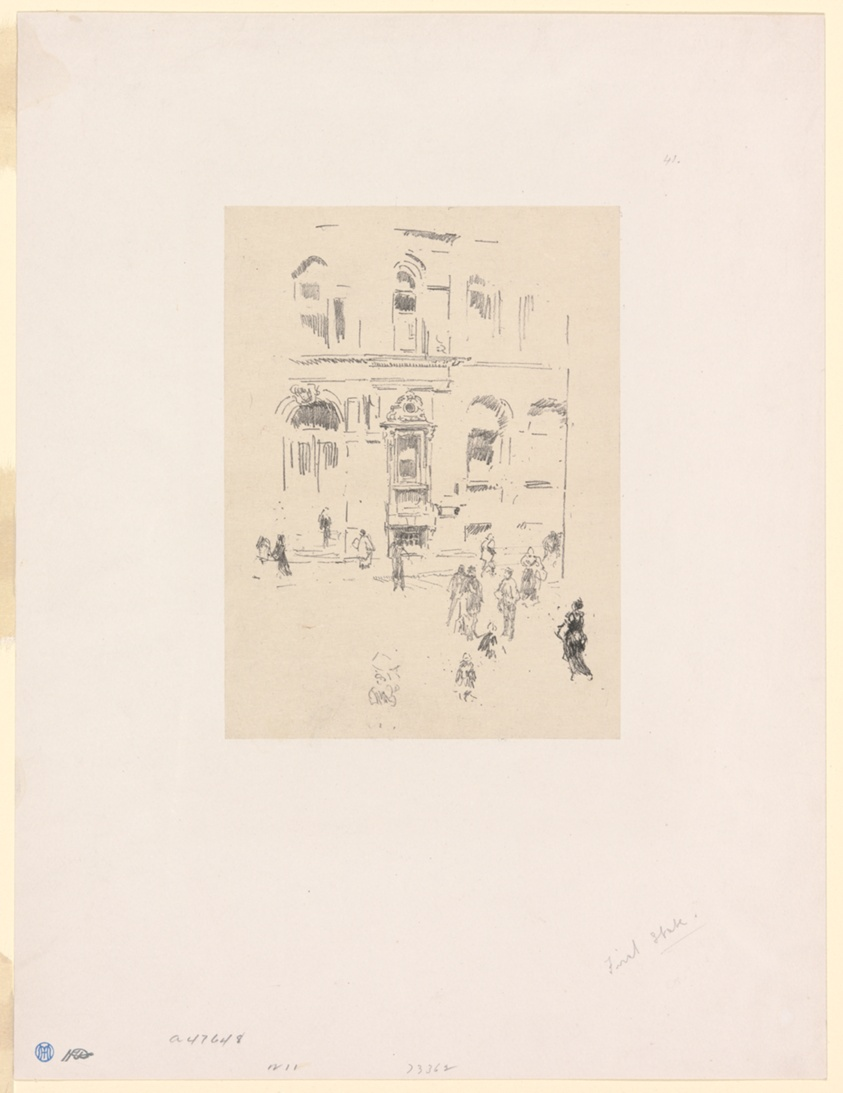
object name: Print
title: Victoria Club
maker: James McNeill Whistler (American, 1834-1903)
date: 1879, published 1887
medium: Transfer lithograph in black with scraping, on cream chine laid down on off-white plate paper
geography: United States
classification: transfer lithograph; lithograph; print; prints and drawing; paper